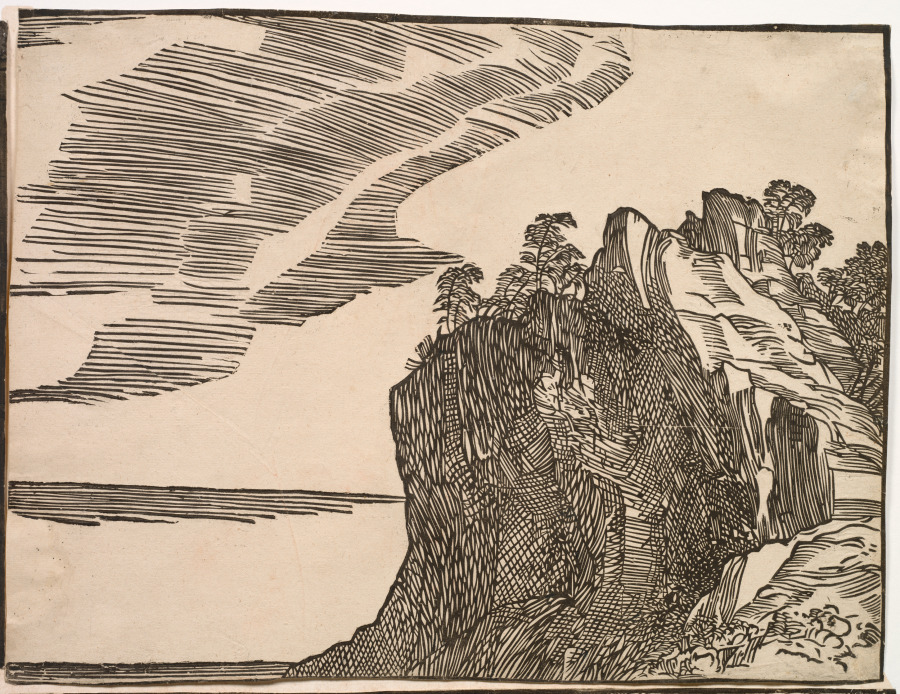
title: The Submersion of Pharaoh's Army in the Red Sea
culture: Italy, Venice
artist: Titian (Italian, c. 1488–1576)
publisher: Domenico dalle Greche (Italian, 1503–1603)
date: 1514–15, printed 1549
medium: woodcut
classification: Print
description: To make this monumental woodcut—considered one of the most ambitious prints of the Renaissance—Titian probably drew directly on the wooden blocks, after which a skilled cutter completed the blocks. The size rivals that of a painting, and the composition would have hung on a wall. Titian’s bold vision presents nature as a vehicle of God’s mercy and wrath. Moses, at right, having parted the seas for the Israelites to pass, commands them to close over the Egyptian forces (Exodus 14:21–31). Titian propelled the narrative with remarkable unity, dedicating entire blocks to the turbulent sea and rolling clouds that culminate in a magnificent cliff and Renaissance city. Some have interpreted the scene as an allegory of Venice’s troubles with the League of Cambrai, a military alliance that threatened the island city.